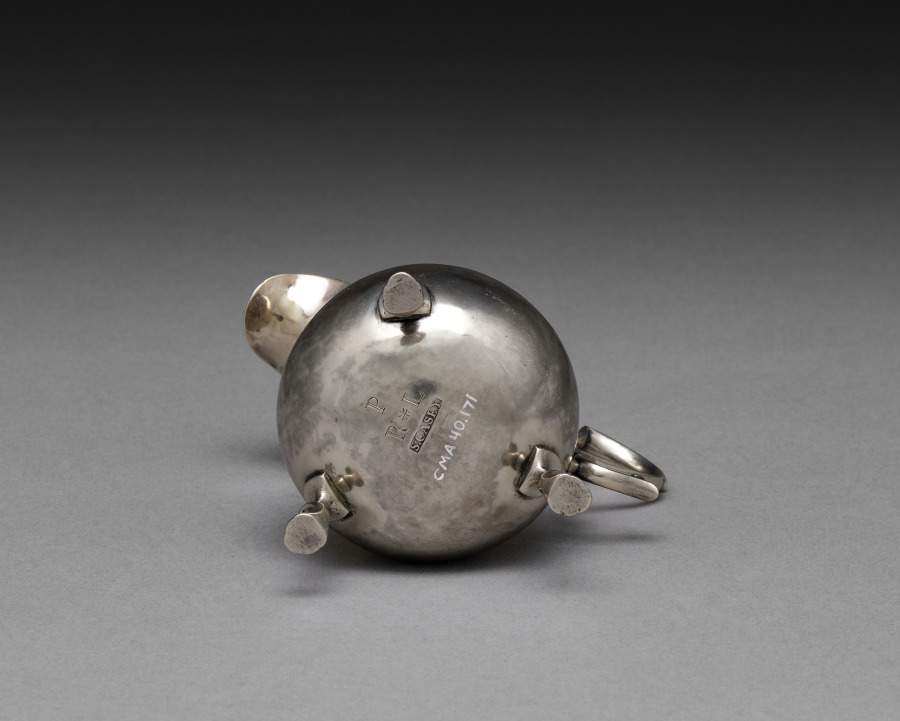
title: Cream Jug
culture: America, Rhode Island, 18th century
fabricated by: Samuel Casey (American, c. 1724–c. 1780)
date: c. 1750–1770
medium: silver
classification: Silver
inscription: engraved "P" over "R*L" in shaded block letters on bottom, just above mark. (The owner's initials, which appear to be original to the cream jug, have not been identified.)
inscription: Stamped underside: "S:CASEY".